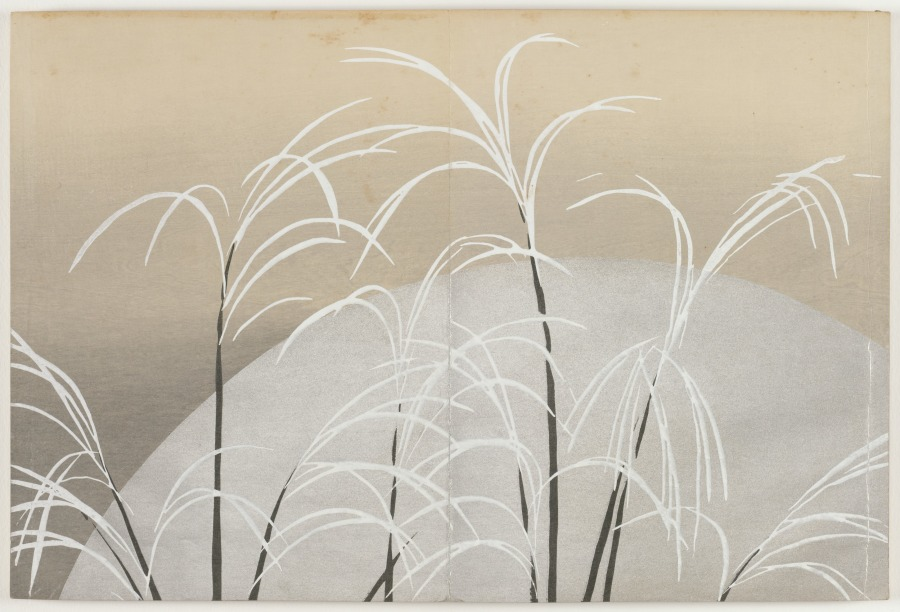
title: Flowers of a Hundred Worlds (Momoyogusa): Susuki Grass in Moonlight (Obana ni tsuki)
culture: Japan, Meiji period (1868–1912)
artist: Kamisaka Sekka (Japanese, 1866–1942)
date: 1909–10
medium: color woodcuts with gold and silver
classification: Bound Volume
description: This print from a set of three woodblock printed albums displays the graphic design prowess of Kamisaka Sekka. The images were first distributed one by one to subscribers to the series but later were reissued in bound form, like this book, for mass consumers. Each print features a vignette taken from nature or Japanese literature. Many of the scenes have a long history in Japan, originating in the 900s or 1000s and having been interpreted by all manner of artists since that time. Sekka’s selections hew closely to precedents from the Rinpa style originated by painter Tawaraya Sōtatsu (c. 1570–c. 1640) and calligrapher Hon’ami Kōetsu (1558–1637).